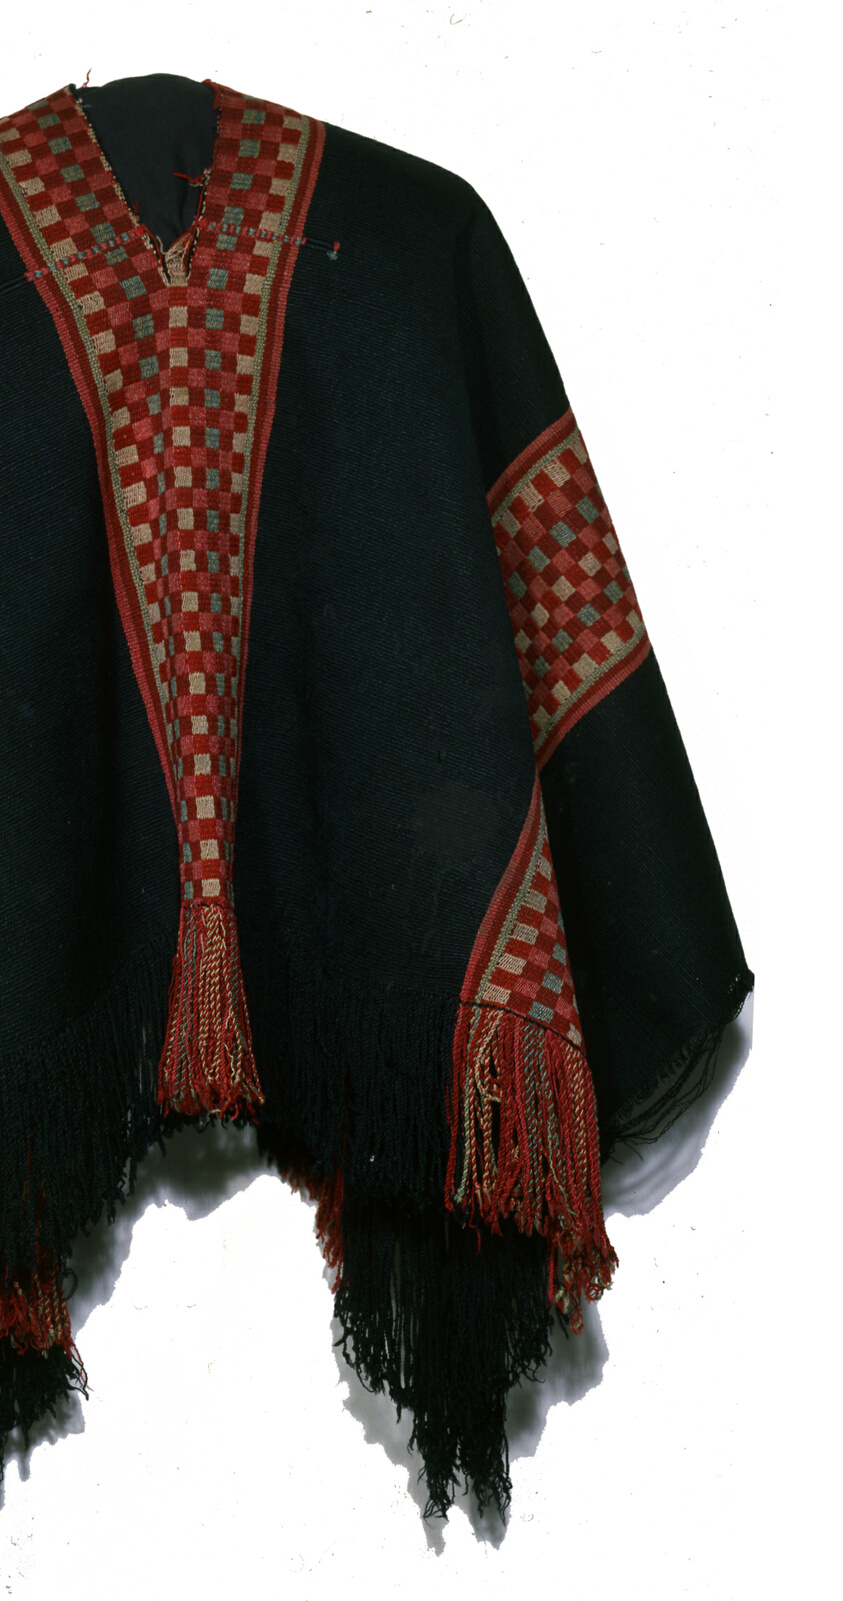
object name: Costume and Accessories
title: Chief’s Poncho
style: Folk Art, araucanian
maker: Mapuche (Chile, Araucanía, Temuco)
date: 1850/1900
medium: Wool, plain weave with stripes of two-color complementary warp weave; embroidered with wool in twined double running stitches; plied warp fringe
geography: Chile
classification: textile; weaving; costume